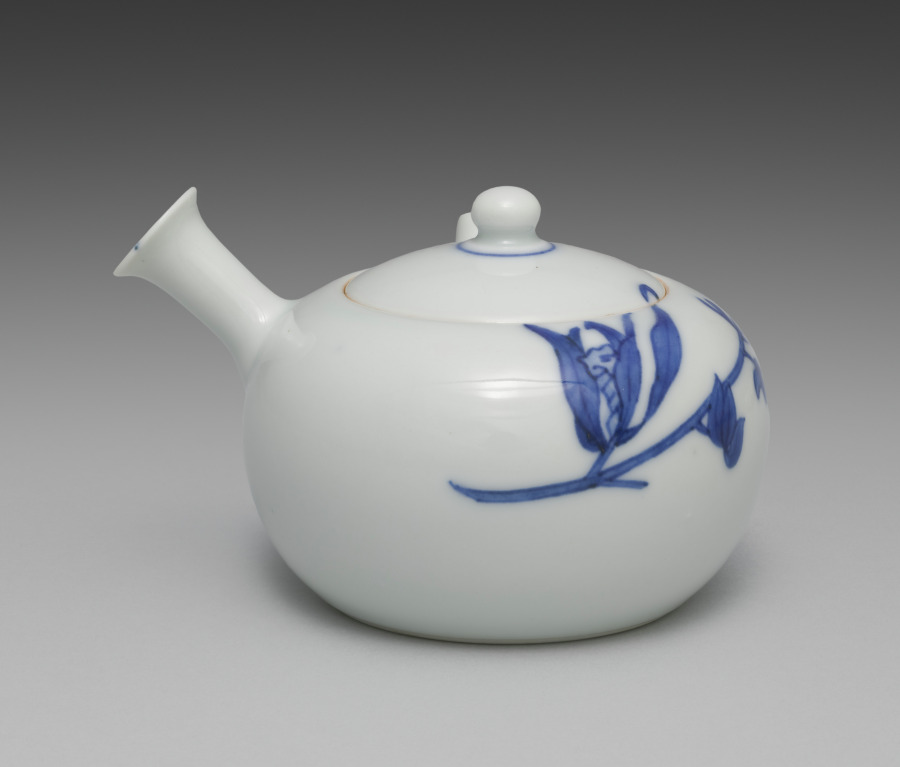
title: Teapot from Tea Set with Orchids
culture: Japan, Meiji period (1868–1912)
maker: Seifū Yohei III (Japanese, 1851–1914)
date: c. 1893–1914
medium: Porcelain with underglaze blue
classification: Ceramic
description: Although the teapot here is stored in a separate box from the five cups, these six pieces may once have been part of a tea set that included other tools such as a water cooler. The teacups have orchid flowers on both sides in underglaze blue, as well as a blue band inside the footring. The teapot has the same design and a blue band painted around the bottom of the lid’s knob. The cups’ long wood storage box is stamped on the exterior, over the lid and base, with a small red seal reading “Satō.” The same seal appears on five small squares of yellow textile, one placed in the bottom of each compartment in the teacup storage box. These are additional to the customary yellow cloths stamped with a “Seifu” seal. Interestingly, four of the Seifū cloths are stamped with an ovoid seal, while the remaining cloth, which is a slightly lighter color, has an unusual seal that is not quite gourd-shaped and with the fū of Seifū in a stylized, unrecognizable form. The teapot has its own box with a Satō seal and is wrapped with an orange textile stamped with the same unusual Seifū seal. A set with a very similar surface design is in the Brooklyn Museum. The Brooklyn set has a water cooler and a small pitcher, in addition to the teapot and cups, and all are in a single storage box. This box records the tea tools as made with kanpakuji, or “bright-jewel white porcelain,” counted among Yohei III’s most important inventions, and carved images. In fact, both sets have a white surface much closer in coloration to the cool white of porcelain clay used in Kyoto at the time, and the designs are simply painted. The Brooklyn set was thus likely mismatched at some point with a box intended for another tea set. Nonetheless, the box may have helped prevent the set’s original components from being dispersed, and the set itself provides insight into how the other tools from the present set may have looked.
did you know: This tea set with orchids has a side-handled pot called a kyūsu, used for steeping, straining, and serving tea.